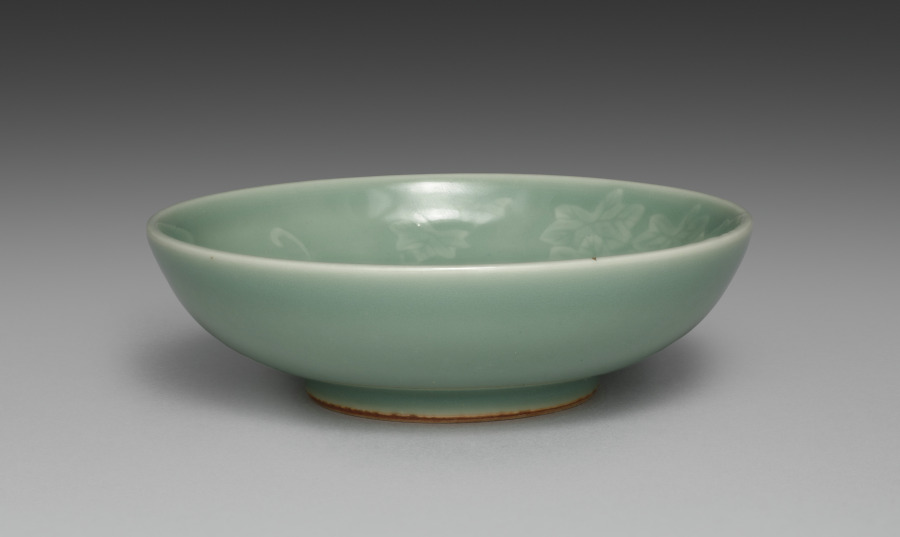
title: Dish from Dishes with Ivy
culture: Japan, Meiji period (1868–1912)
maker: Seifū Yohei III (Japanese, 1851–1914)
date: 1893–1914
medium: One from a set of five dishes; porcelain with green glaze and molded designs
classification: Ceramic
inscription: 清風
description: Yohei III’s main output for his sophisticated clientele was in the form of tea sets and dining sets. He often produced in pairs, sets of five, or sets of ten. This set of five dishes with a green glaze and designs of ivy vines in very low relief has unfortunately lost its box. These dishes are slightly larger than the other dishes, like CMA 2022.187, and so may have been not saucers but rather small plates for meals.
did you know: In his career, Seifū Yohei III created a range of dishes in green glazes.